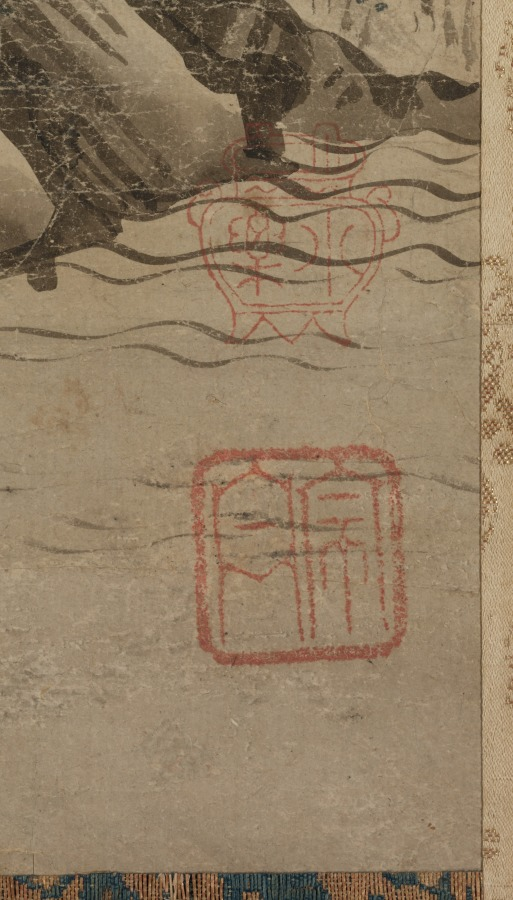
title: Playing Flute in Moonlight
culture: Japan, Muromachi period (1392–1573)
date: 1392–1573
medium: hanging scroll; ink on paper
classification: Painting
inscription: Sealed: 小栗, 宗丹